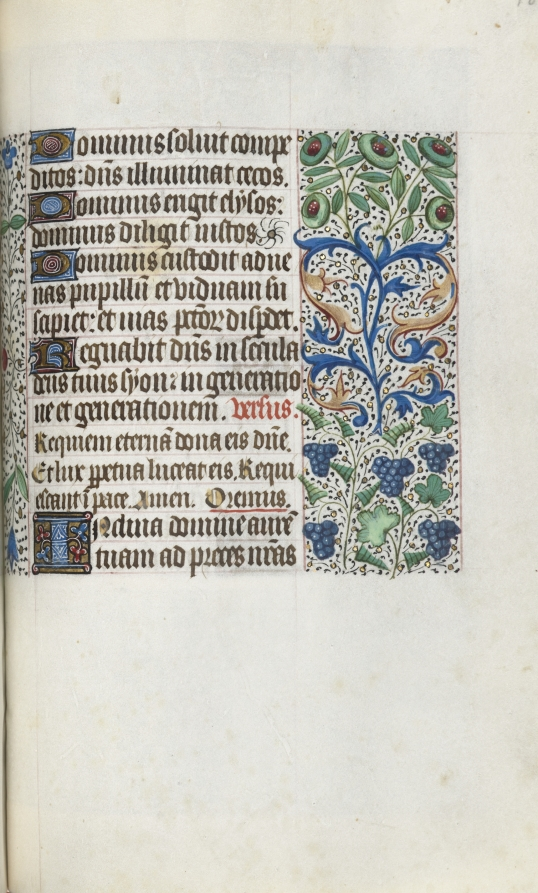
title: Book of Hours (Use of Rouen): fol. 109r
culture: France, Rouen, 15th century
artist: Master of the Geneva Latini (French, active Rouen, 1460–80)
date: c. 1470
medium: ink, tempera, and gold on vellum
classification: Bound Volume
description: In the late 1400s and early 1500s Rouen was an established and important center of book production. The city’s cathedral had a wealthy chapter that spent large sums of money to commission books and to maintain its extensive library. The stationers and booksellers would have likely been concentrated in or near the cathedral precinct. This artist, named after a manuscript now in Geneva, was Rouen’s principal illuminator during the second half of the 1400s.